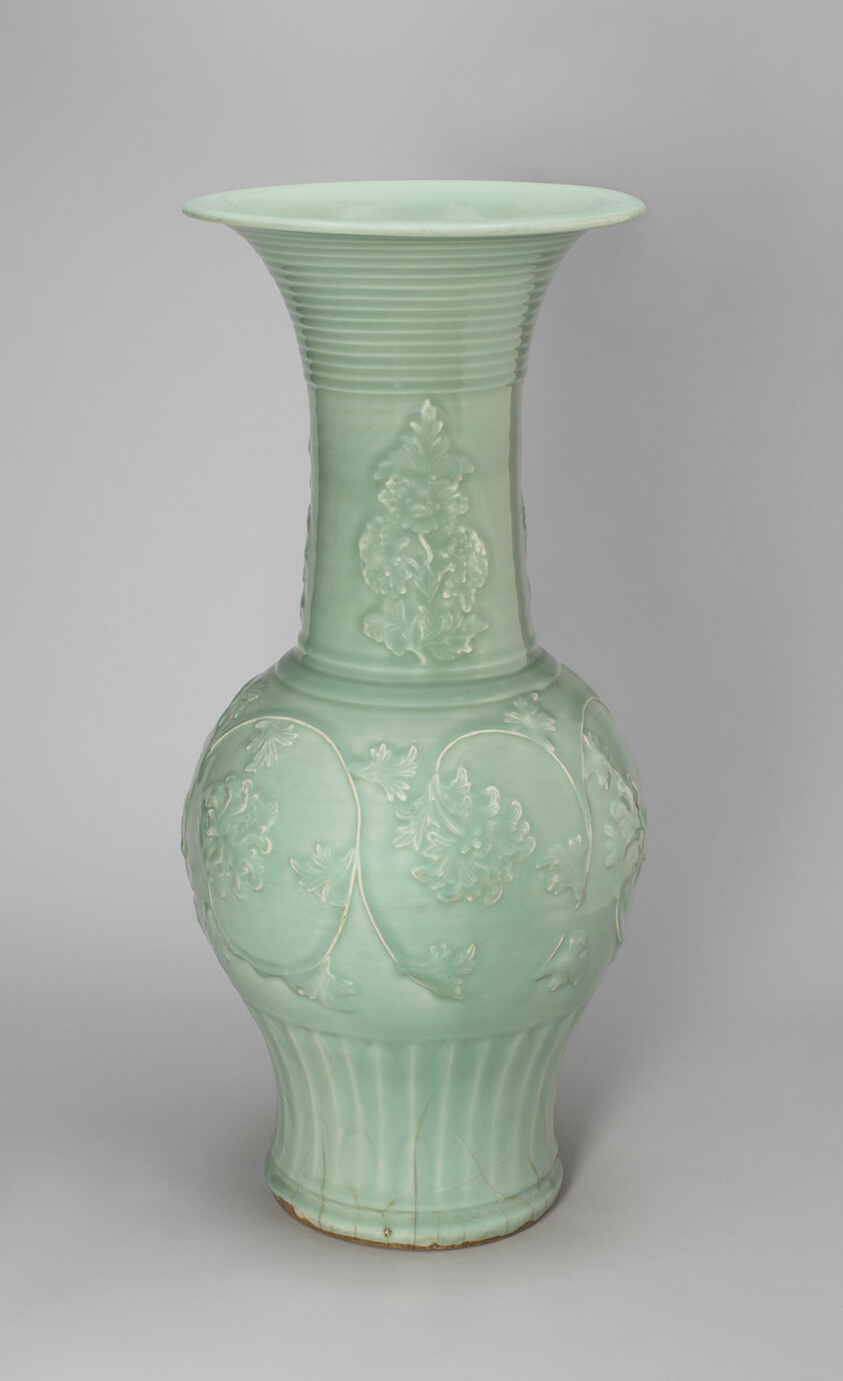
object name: Vessel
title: Large Baluster-Shaped Vase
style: Chinese (culture or style)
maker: China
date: Yuan dynasty (1279–1368), 14th century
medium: Longquan ware; stoneware with translucent, pale bluish-green glaze and molded relief floral spray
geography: China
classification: vase; vessel; stoneware; asian art; ceramics